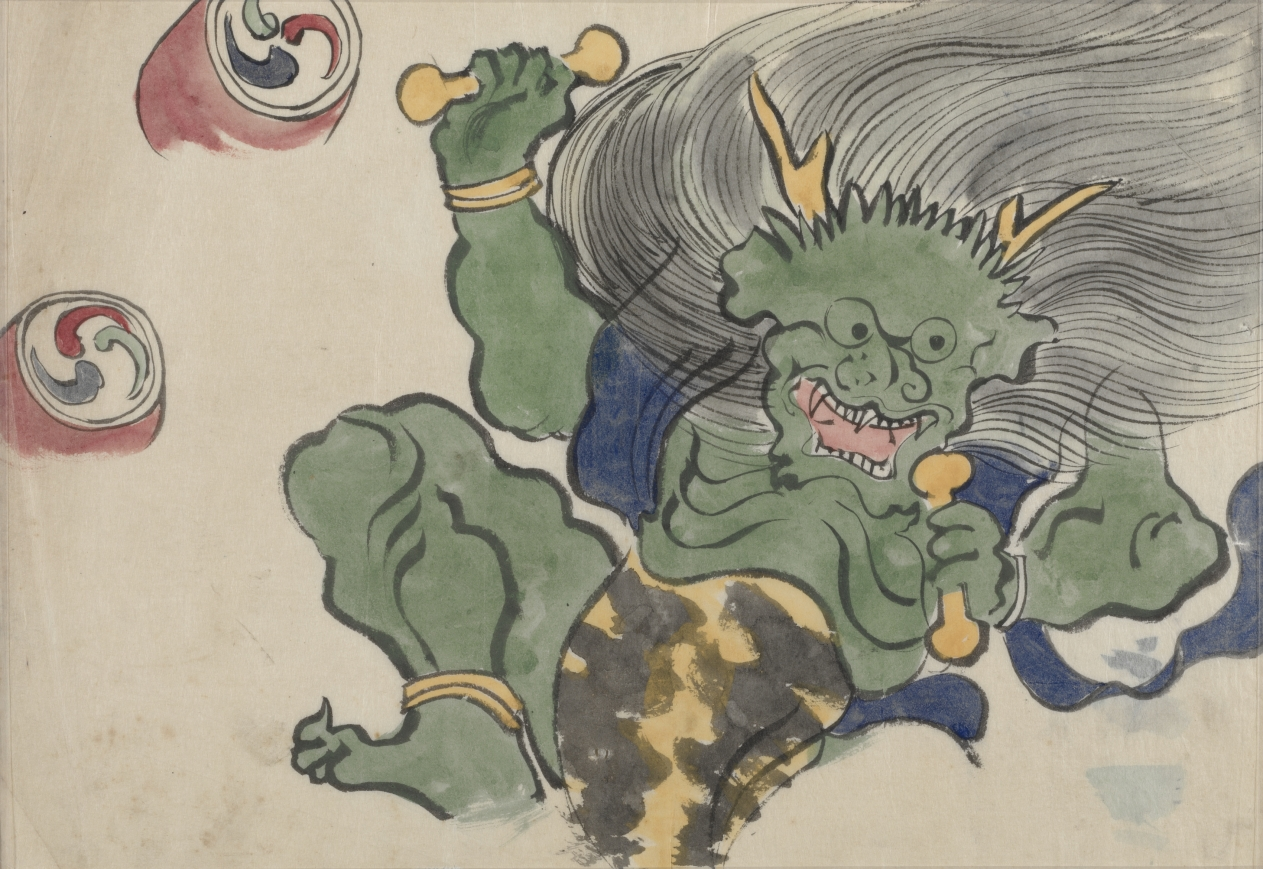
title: Flowers of a Hundred Worlds (Momoyogusa): God of Thunder (Raijin)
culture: Japan, Meiji period (1868–1912)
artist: Kamisaka Sekka (Japanese, 1866–1942)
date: 1909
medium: ink and color on paper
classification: Drawing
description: Kamisaka Sekka made preparatory drawings for his Flowers of a Hundred Worlds series on tracing paper with ink and color. The freehand sketches are much looser than the finished, printed compositions.